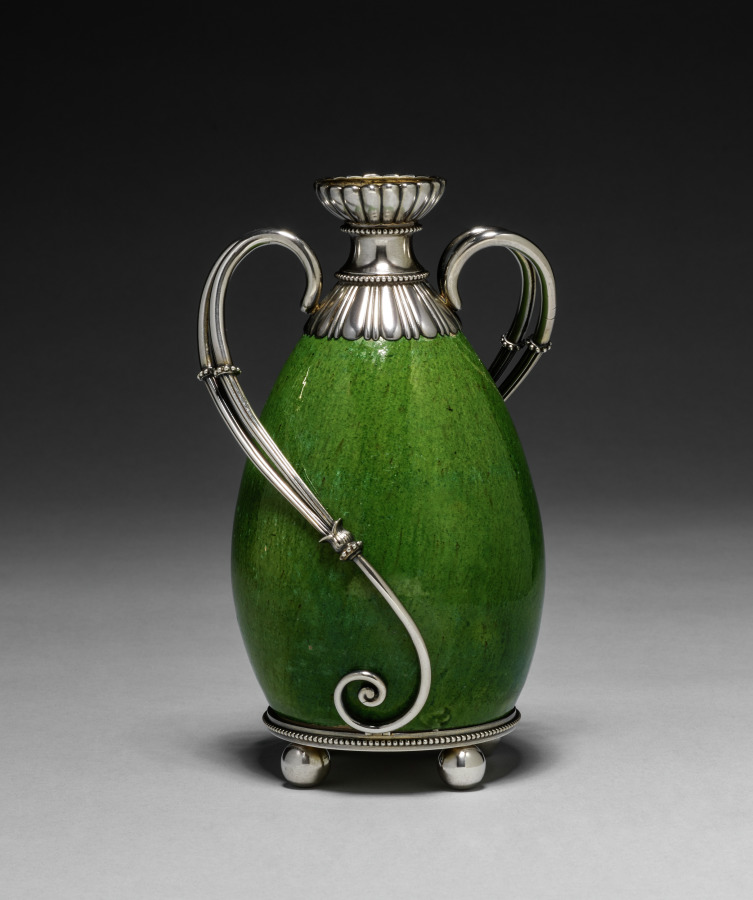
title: Vase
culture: Russian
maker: House of Fabergé (Russian, 1842–1918)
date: c. 1890–99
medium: ceramic, silver-gilt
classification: Ceramic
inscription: Inscribed “K. Fabergé” in Cyrillic, surmounted by the double headed Imperial eagle.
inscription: “88” silver standard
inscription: St. Petersburg coat of arms (St. George and the dragon)